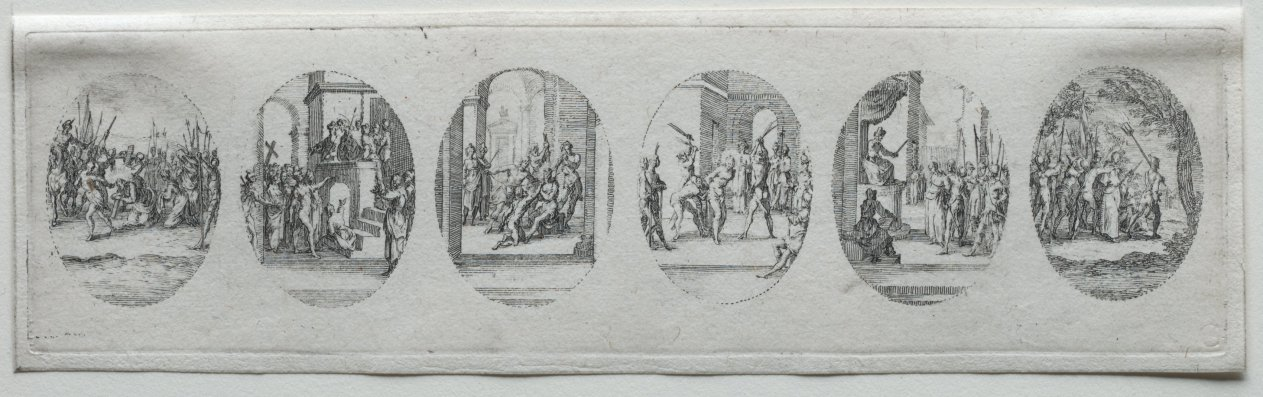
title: The Mysteries of the Passion: The Flagellation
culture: France, 17th century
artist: Jacques Callot (French, 1592–1635)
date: 1631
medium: etching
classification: Print